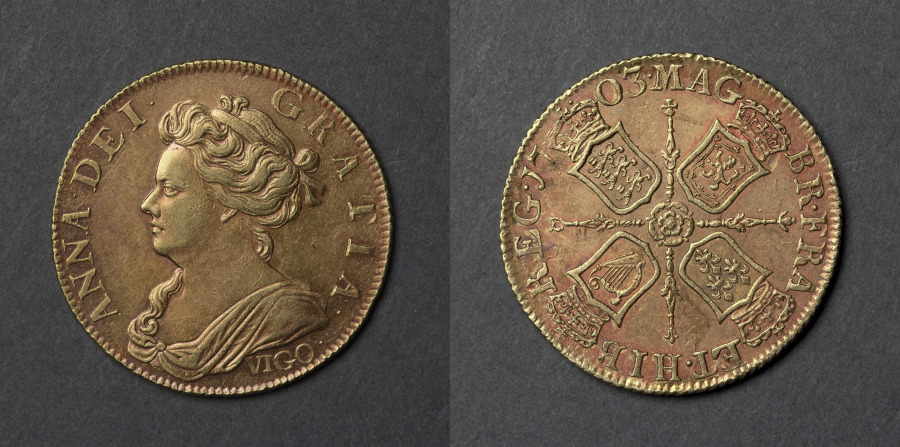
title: Guinea: Anne (obverse); Shields and rose (reverse)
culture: England, Anne, 1702-1714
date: 1703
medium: gold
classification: Coins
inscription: ANNA.DEI. GRATIA VIGO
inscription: MAG BR. FRA ET. HIB REG 1703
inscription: DECUS ET TUTAMEN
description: The coinage of Anne's reign remained fairly constant being inaugurated in 1662. Before the Act of Union with Scotland (1706), the arms of England and Scotland remined separate, as shown. After the act the two arms were conjoined on one shield. The word Vigo denotes that the coins were struck from gold captured from the Spanish at the Battle of Vigo Bay (1702). Although silver coins bearing the Vigo inscription are less rare, the three gold denominations bearing the symbol are all extremely rare.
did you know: The Battle of Vigo Bay occurred on October 23, 1702. After the battle the treasure, largely of silver with a tiny proportion of gold, was transported back to England and coins were made bearing the inscription Vigo.